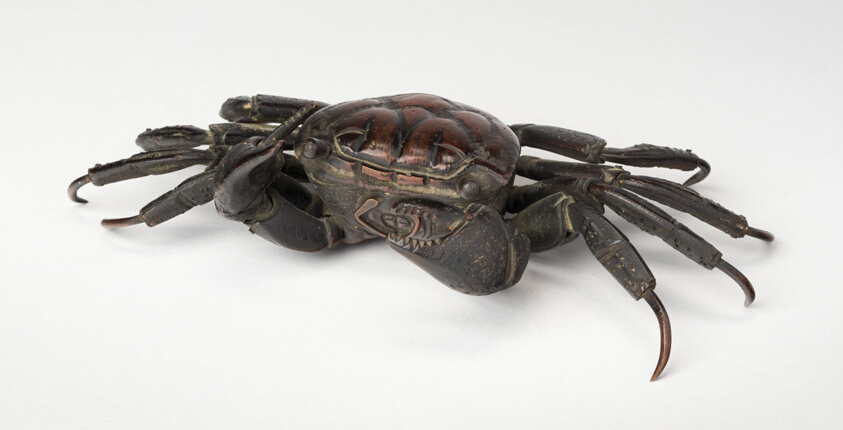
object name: Metalwork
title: Articulated crab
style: Japanese (culture or style)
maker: Artist Unkown; Japanese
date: Active 19th century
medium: Bronze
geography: Japan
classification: bronze; metal; decorative object/ornament; asian art; metalwork